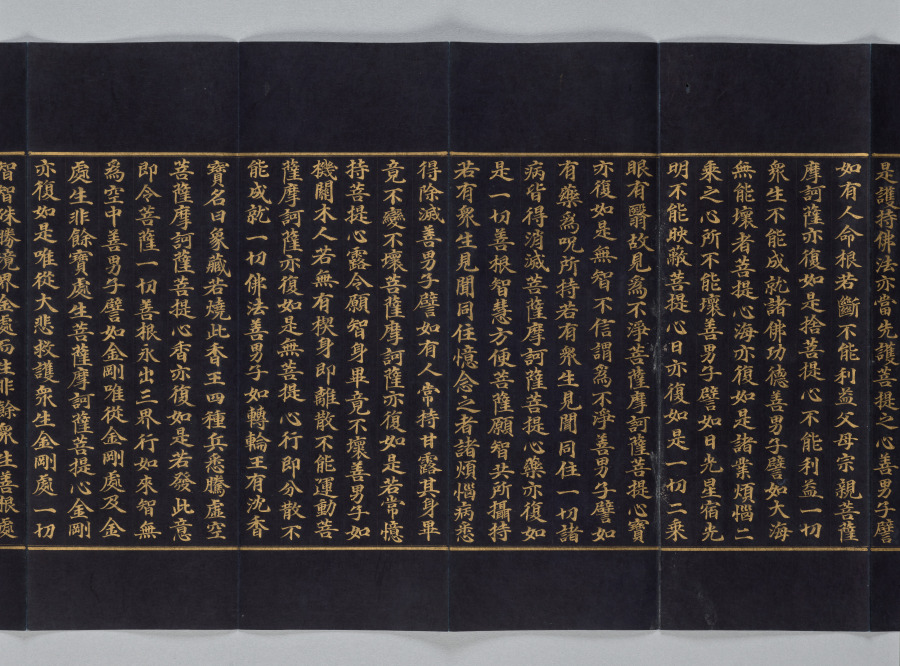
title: Avatamsaka Sutra No. 78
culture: Korea, Goryeo dynasty (918–1392)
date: 1300s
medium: Folded book with illustrated frontispiece; gold and silver on mulberry paper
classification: Bound Volume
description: This illuminated manuscript presents one part of the multivolume sacred text titled Avatamsaka (Flower Garland) sutra. Both the script and the image are rendered in gold ink on the smooth surface of the dark blue, indigo-dyed mulberry paper. This portion of the text, which reads from right to left, describes the encounter of the Buddha of the Future (Maitreya) and the young pilgrim Sudhana. The Buddha gives his words of wisdom to Sudhana, who asks questions about the path toward spiritual awakening. Mixed with ink and glue, the gold has a brilliance that strikingly reflects Sudhana’s ardent quest for understanding the way to reach enlightenment.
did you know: The pristine condition of this manuscript indicates that it was rarely used after its creation, revealing that the act of making a manuscript rather than reading it was the main religious goal.